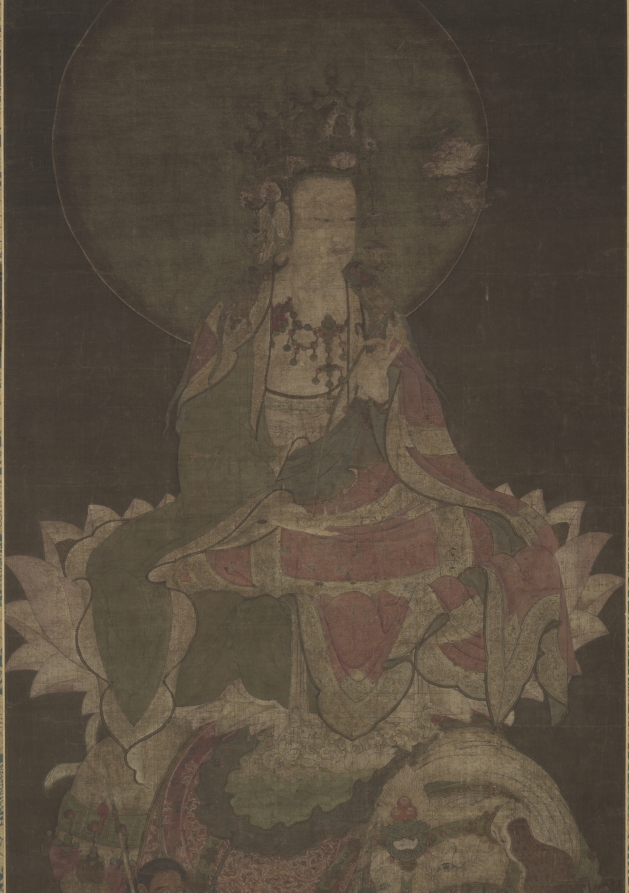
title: Samantabhadra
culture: China, Southern Song dynasty (1127-1279)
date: 1100s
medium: hanging scroll; ink and color on silk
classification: Painting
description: In the last chapter of the Lotus Sutra, one of the principal Buddhist texts, the great Bodhisattva Samantabhadra is described advancing to earth, riding on a six-tusked elephant, and proclaiming himself protector of the faithful. More frequently, he is shown with Bodhisattva Manjusri as the attendants of Shakyamuni (the historical Buddha). This scroll is probably the left panel in a triptych (group of three paintings) portraying these deities.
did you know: Samantabhadra holds a lotus with a sutra on top of the blossom.